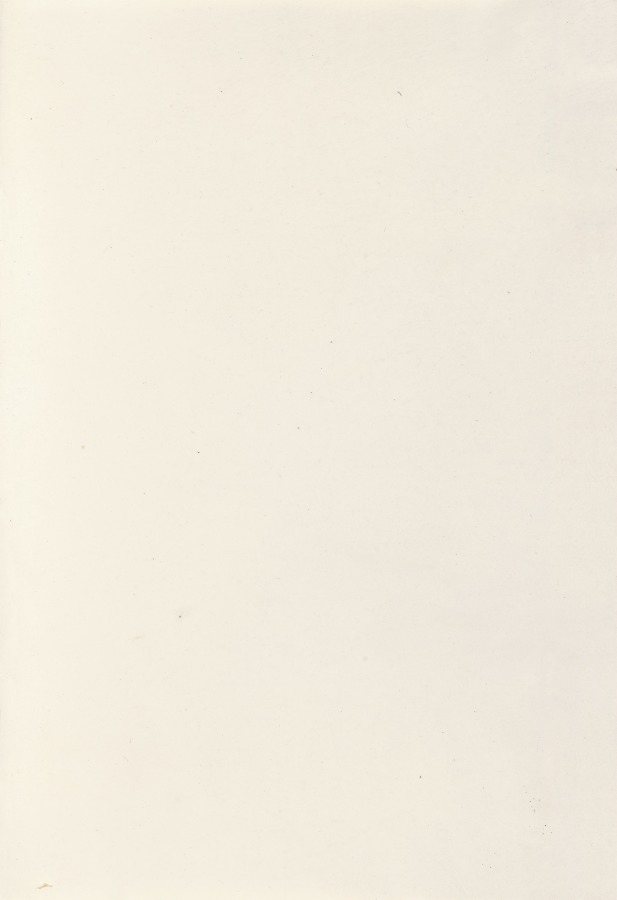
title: Hours of Queen Isabella the Catholic, Queen of Spain: Fol. 280v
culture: Flanders, Ghent and Bruges, late 15th century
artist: Master of the First Prayerbook of Maximillian (Flemish, c. 1444–1519)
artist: and Associates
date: c. 1500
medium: ink, tempera, and gold on vellum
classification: Bound Volume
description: This manuscript was illuminated by a circle of at least five highly organized manuscript painters active in the Flemish cities of Ghent and Bruges. The principal illuminator was Alexander Bening, who painted the majority of the book's miniatures. Manuscripts produced by this circle of artists are renowned for the decoration of their borders, which typically feature a rich variety of realistically-painted flowers, birds, and butterflies. This prayer book, called a book of hours, was intended not for a cleric, but for the private devotions of a lay person-in this case, Isabella the Catholic, Queen of Spain (1451-1504). Isabella's coat of arms embellishes the book's frontispiece. It is unlikely that the book was commissioned by the Queen herself; rather, she probably received it as a diplomatic gift from someone courting her patronage, perhaps Cardinal Francisco Jimenez de Cisneros. A Franciscan friar, Jimenez was dependent upon Isabella for his advancement, first to the post of Queen's confessor in 1492, and then to Archbishop of Toledo in 1495.